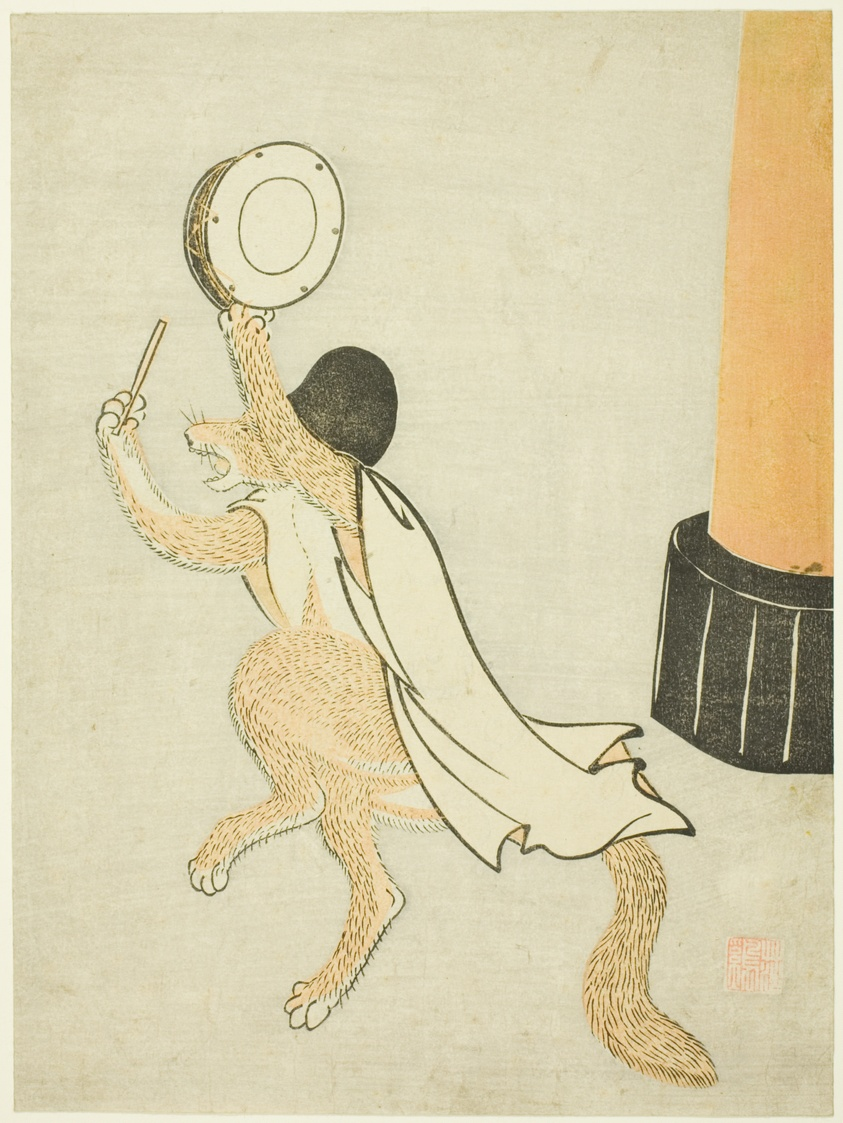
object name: Print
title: The Dancing Fox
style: Japanese (culture or style)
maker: Artist unknown; Japanese, mid- to late 18th century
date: 1766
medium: Color woodblock print; chuban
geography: Japan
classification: woodblock print; print; asian art